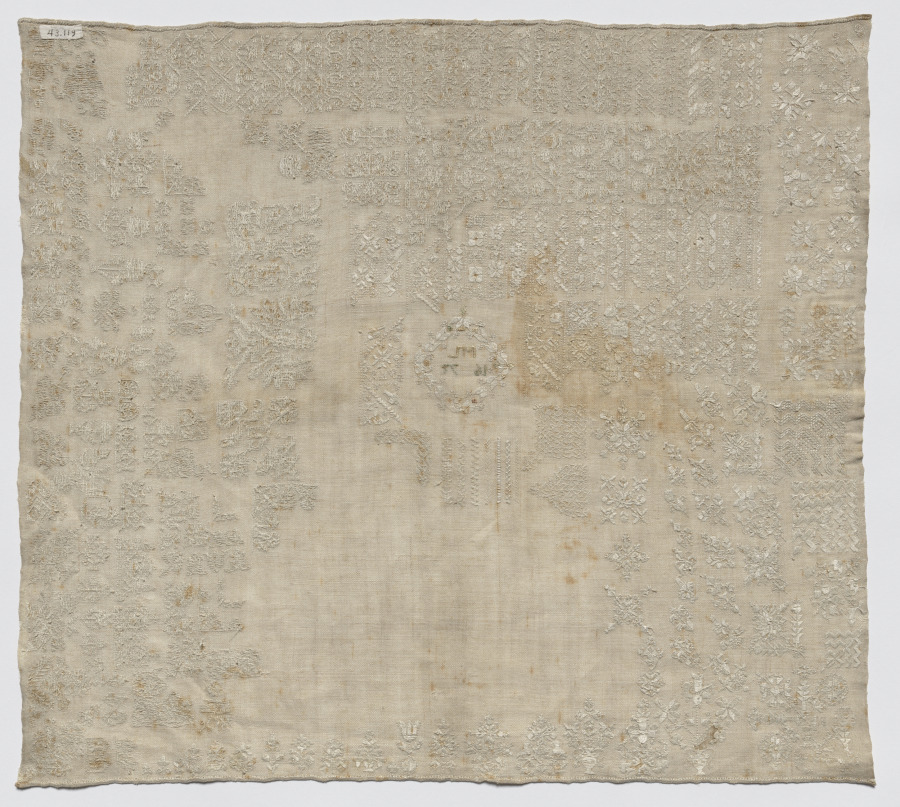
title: Sampler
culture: Italy, 17th century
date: 1672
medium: embroidery: linen thread on linen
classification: Sampler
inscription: enclosed in wreath: "ML / 1672."